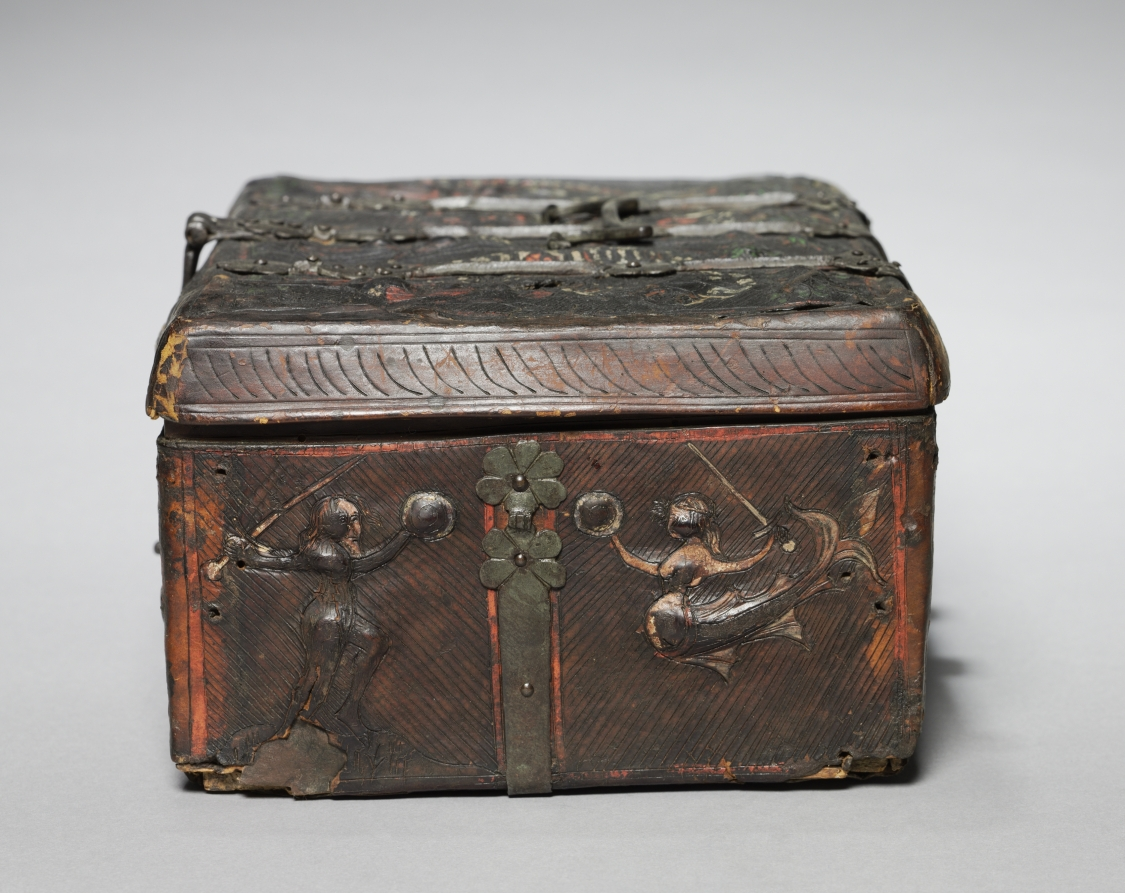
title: Leather Casket with Scenes of Courtly Love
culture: France, Gothic period, 2nd half of the 14th century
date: c. 1350–1400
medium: Leather: embossed, incised; iron mounts; wood core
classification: Leather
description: During the Middle Ages, small boxes like this were produced for the secular market. Used for storing personal items, the boxes typically consisted of a wood core that might be decoratively painted and gilded or covered with another material, such as ivory or leather. Manufactured in small, highly specialized leather workshops, these richly embellished caskets were valued furnishings in the homes of the aristocratic clientele that commissioned them. On the lid of this box, a couple is shown with banderoles inscribed in Old French with expressions of mutual love. "Hold my heart," requests the lady. "But you already have it," replies the man. On the front of the casket, the man, holding a heart, appears again and states, "Have it once more."